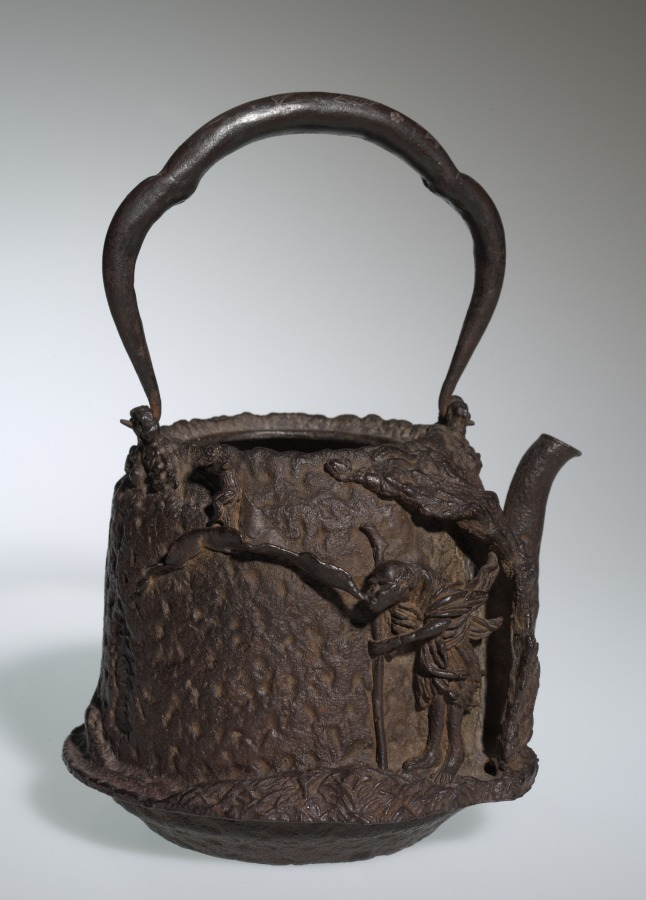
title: Covered Tea Kettle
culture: Japan, Edo period (1615–1868)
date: 1615–1868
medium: iron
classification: Metalwork